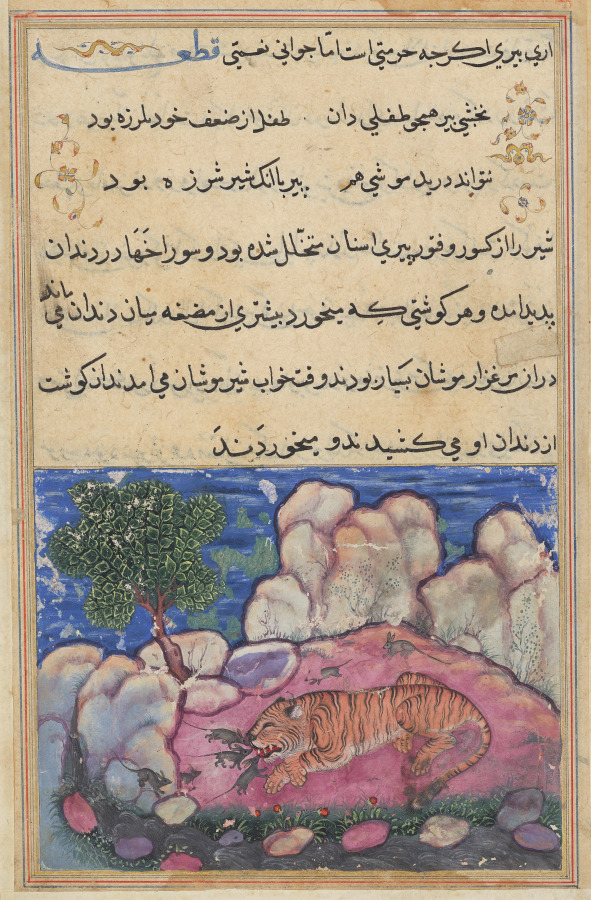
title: The lion disturbed by mice who eat the food trapped in his aging teeth, from a Tuti-nama (Tales of a Parrot): Fifteenth Night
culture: India, Mughal court, 16th century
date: c. 1560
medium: gum tempera, ink, and gold on paper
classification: Painting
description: In a scene that was overpainted to suit the taste of the emperor Akbar for soft modeling and a naturalistic sky, a tiger lies in a pink clearing, while mice run around him to pick at his teeth. The artist has depicted a tiger instead of a lion, the two often being interchangeable in Indian art. In the story, the lion had grown old and suffered from cavities, into which his food would get stuck. Mice would come and feed on those morsels between his teeth and disturb his sleep.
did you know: This story takes place in China